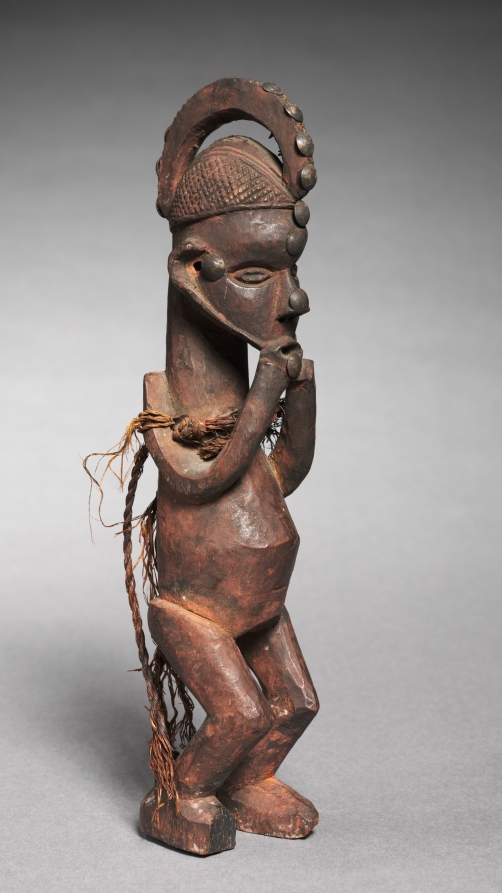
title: Male Figure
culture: Central Africa, Democratic Republic of the Congo, Suku, early 20th century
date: early 1900s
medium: Wood, upholstery studs, and plant fiber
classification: Sculpture